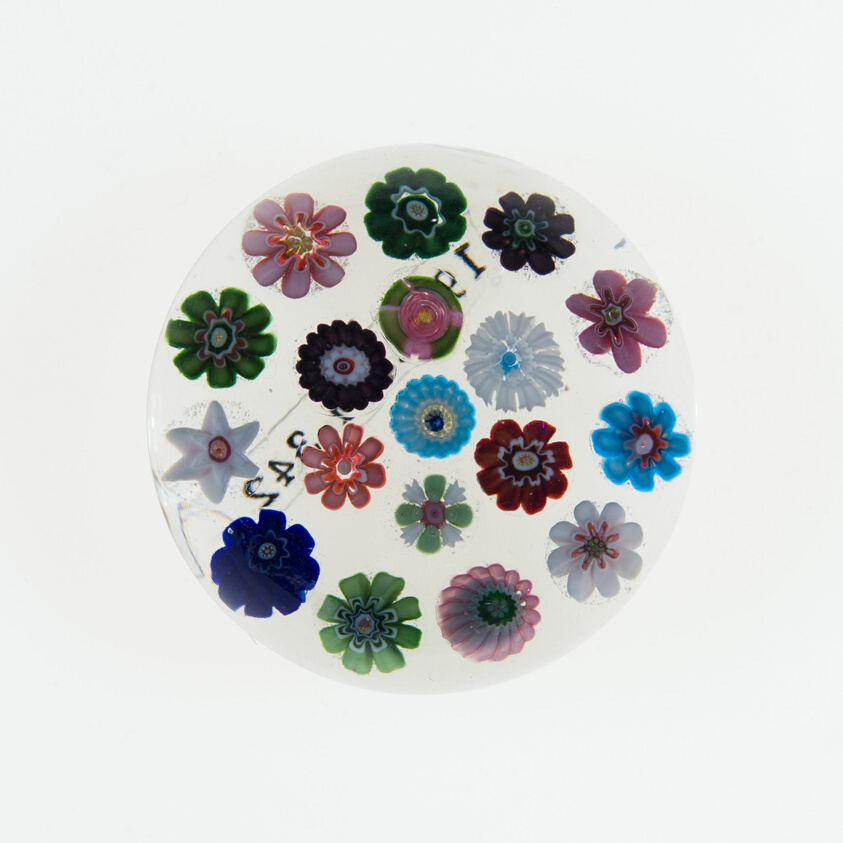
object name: Glass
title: Paperweight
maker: Clichy Glassworks (Cristalleries de Clichy); Clichy, France, 1837-1885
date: c. 1845/60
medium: Glass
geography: France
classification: paperweight; glass